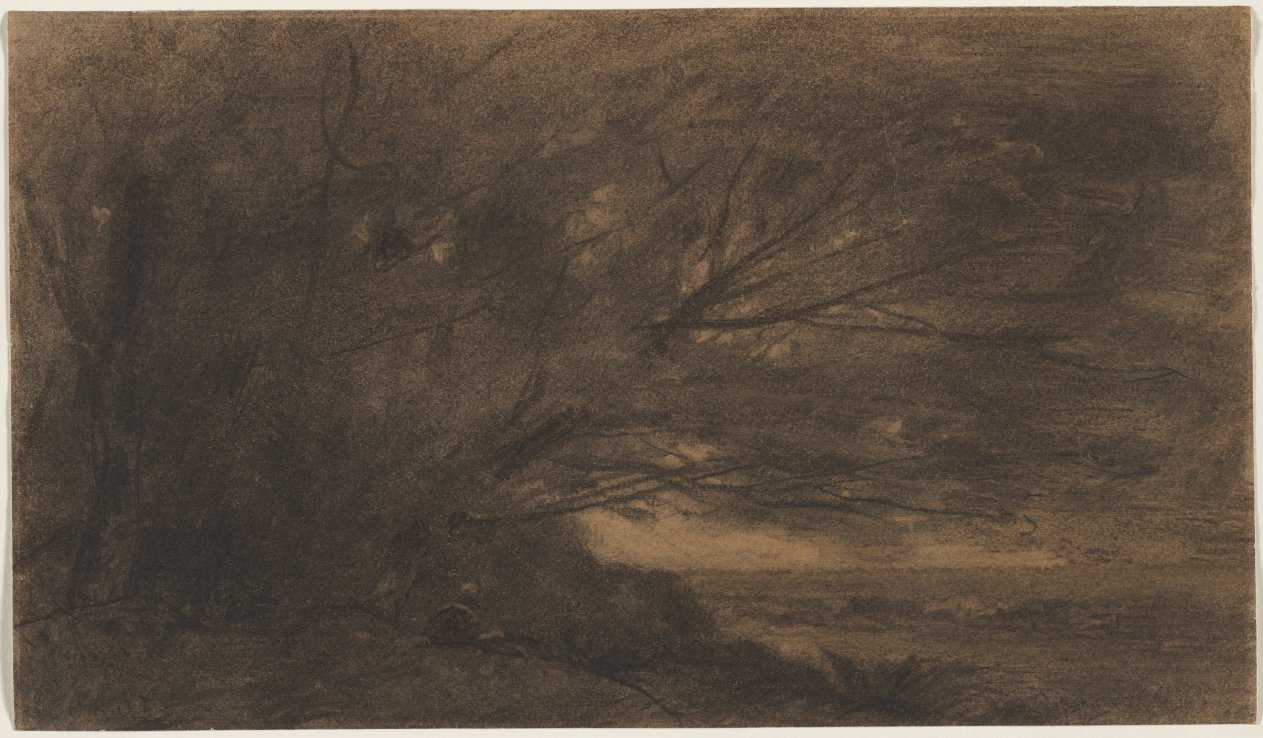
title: Landscape (The Large Tree)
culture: France, 19th century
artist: Jean Baptiste Camille Corot (French, 1796–1875)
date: c. 1865–70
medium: charcoal with stumping, erasing, and wet brushwork on light brown wove paper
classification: Drawing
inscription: inscribed, lower left, in charcoal: COROT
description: Jean-Baptiste-Camille Corot used sticks of charcoal, a powdery black medium, to dramatic effect in this late-career landscape, layering them and turning them on their side to form tonal areas and fine lines. Describing the period when the drawing was made, a colleague wrote that “one never saw [Corot] without . . . charcoal in his hand.” Such artworks conveyed the poetry the artist saw in nature and advanced his lifelong ambition of elevating landscape from the lowly status it held at the conservative French Academy. Here, he aimed to capture an evocative mood rather than a specific place, describing such works as “souvenirs,” or remembrances.